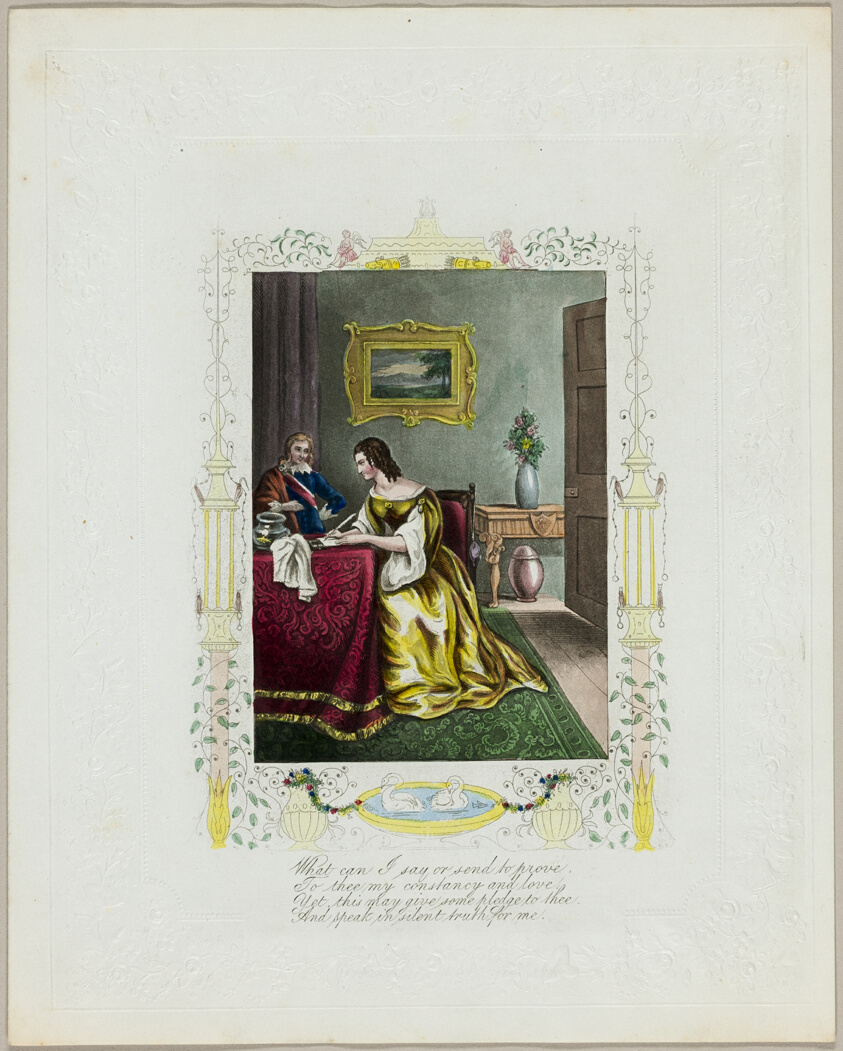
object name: Print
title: What Can I Say or Send to Prove (valentine)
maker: Unknown Artist; English, 19th century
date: c. 1840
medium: Lithograph with hand-coloring on embossed off-white wove paper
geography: England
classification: valentine; prints and drawing; print